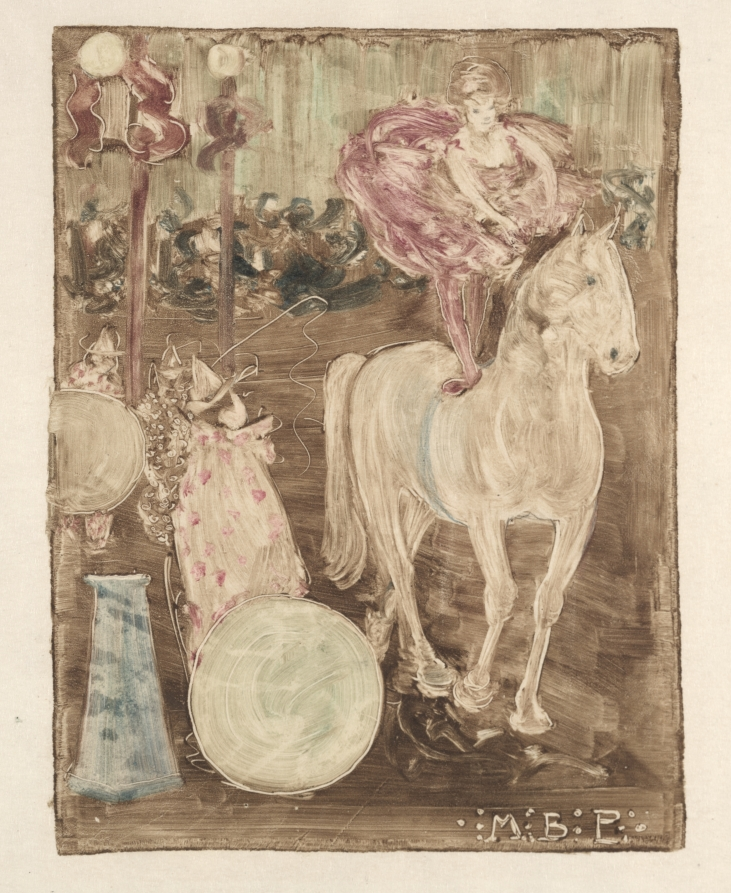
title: Bareback Rider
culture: America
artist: Maurice Prendergast (American, born Newfoundland [now Canada], 1858–1924)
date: c. 1895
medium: color monotype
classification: Monotype